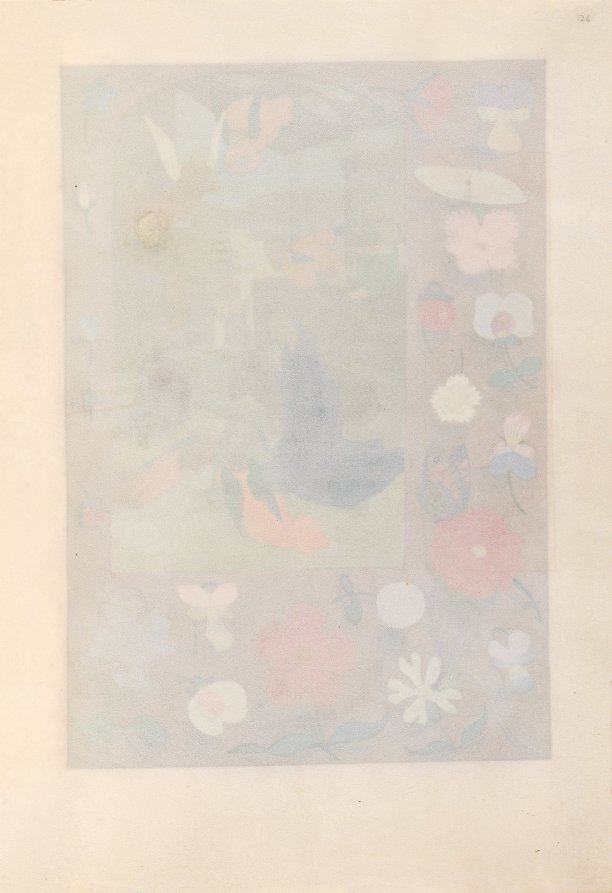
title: Hours of Queen Isabella the Catholic, Queen of Spain: Fol. 126r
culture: Flanders, Ghent and Bruges, late 15th century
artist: Master of the First Prayerbook of Maximillian (Flemish, c. 1444–1519)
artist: and Associates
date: c. 1500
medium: ink, tempera, and gold on vellum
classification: Bound Volume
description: This manuscript was illuminated by a circle of at least five highly organized manuscript painters active in the Flemish cities of Ghent and Bruges. The principal illuminator was Alexander Bening, who painted the majority of the book's miniatures. Manuscripts produced by this circle of artists are renowned for the decoration of their borders, which typically feature a rich variety of realistically-painted flowers, birds, and butterflies. This prayer book, called a book of hours, was intended not for a cleric, but for the private devotions of a lay person-in this case, Isabella the Catholic, Queen of Spain (1451-1504). Isabella's coat of arms embellishes the book's frontispiece. It is unlikely that the book was commissioned by the Queen herself; rather, she probably received it as a diplomatic gift from someone courting her patronage, perhaps Cardinal Francisco Jimenez de Cisneros. A Franciscan friar, Jimenez was dependent upon Isabella for his advancement, first to the post of Queen's confessor in 1492, and then to Archbishop of Toledo in 1495.